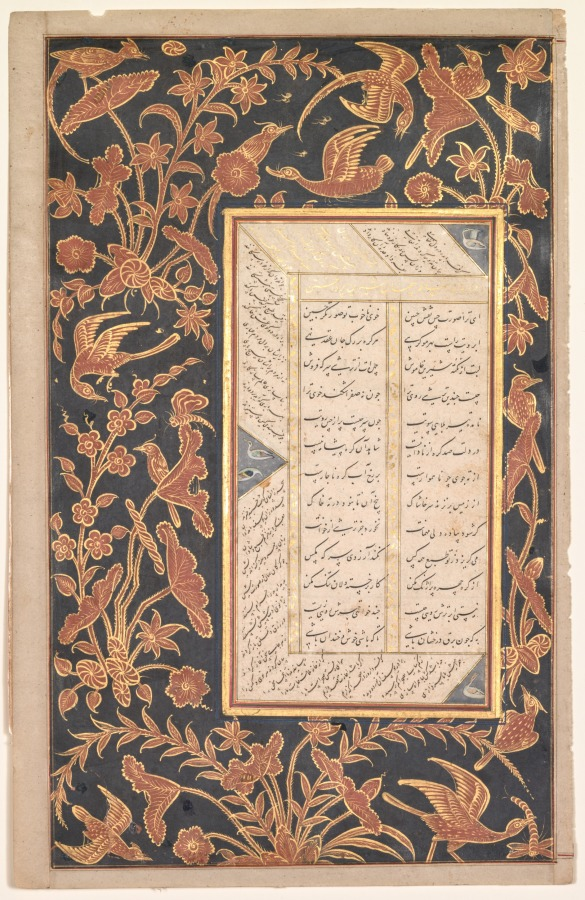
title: Folio B: Folio from the "Five Treasures" (Panj Ganj) of Jami (recto)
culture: Northern India, Mughal, early 17th century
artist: Mushfiq (Indian, active early 1600s)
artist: and others (Indian)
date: 1520–1607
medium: Gum tempera, ink, and gold on paper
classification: Painting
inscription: The miniature signed at upper left: ' amal - i Mushfiq sana 1015 (the work of the Mushfiq year 1015) Text on verso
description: This page contains two different texts, one written diagonally in the border and the other in the two central columns. The section of poetry in the border describes an episode from Joseph’s childhood in which his older brothers suggest to Jacob, their father, that they take Joseph into the countryside so that the boy can learn the area, although they actually plan to kill him. The poem in the central columns advises the reader to smile often, as a smile is sweeter and more pleasing than sugar.